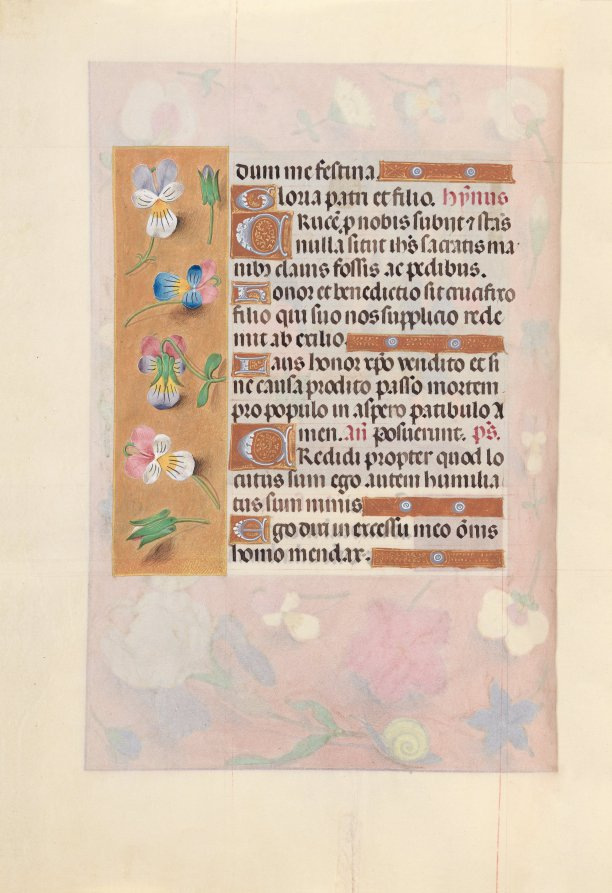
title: Hours of Queen Isabella the Catholic, Queen of Spain: Fol. 66v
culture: Flanders, Ghent and Bruges, late 15th century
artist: Master of the First Prayerbook of Maximillian (Flemish, c. 1444–1519)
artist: and Associates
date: c. 1500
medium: ink, tempera, and gold on vellum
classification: Bound Volume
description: This manuscript was illuminated by a circle of at least five highly organized manuscript painters active in the Flemish cities of Ghent and Bruges. The principal illuminator was Alexander Bening, who painted the majority of the book's miniatures. Manuscripts produced by this circle of artists are renowned for the decoration of their borders, which typically feature a rich variety of realistically-painted flowers, birds, and butterflies. This prayer book, called a book of hours, was intended not for a cleric, but for the private devotions of a lay person-in this case, Isabella the Catholic, Queen of Spain (1451-1504). Isabella's coat of arms embellishes the book's frontispiece. It is unlikely that the book was commissioned by the Queen herself; rather, she probably received it as a diplomatic gift from someone courting her patronage, perhaps Cardinal Francisco Jimenez de Cisneros. A Franciscan friar, Jimenez was dependent upon Isabella for his advancement, first to the post of Queen's confessor in 1492, and then to Archbishop of Toledo in 1495.